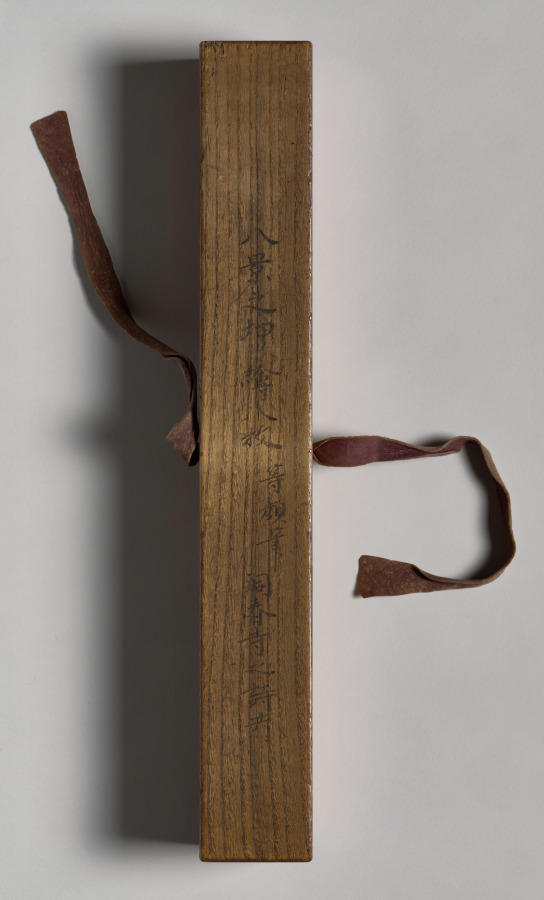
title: Poems and Pictures of the Eight Views of Xiao-Xiang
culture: Japan, Momoyama period (1573–1615)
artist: Unkoku Tōgan (Japanese, 1547–1618)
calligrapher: Inkei Gentetsu (Japanese, 1562–1612)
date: 1605–12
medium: Handscroll; ink on paper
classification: Painting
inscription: Each painting sealed with red gourd-shaped seal reading Unkoku (雲谷) and a square seal reading Tōgan (等顔).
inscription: Each painting prefaced with a titled poem on the Eight Views of Xiao-Xiang by Yujian Ruofen (active late 13th century) inscribed by Japanese Buddhist monk Inkei Gentetsu (1562–1612).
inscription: 右寫玉㵎之筆勢／雪舟末葉等顔筆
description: Unkoku Tōgan brushed these scenes using the splashed-ink technique associated in Japan with the Chinese monk Yujian Ruofen (active late 1200s). Xiao-Xiang refers to the region in present-day Hunan province, where the Xiang River and its tributaries converge. Each of the eight views evokes a time of day or season. The earliest surviving series of Xiao-Xiang paintings is by Wang Hong (active mid-1100s), but textual evidence tells us the theme appears earlier. It was later adopted in Japan and Korea, as seen here. The poems were inscribed by Inkei Gentetsu, the third abbot of the Rinzai Zen temple Tōshunji, Japan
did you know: The “Tō” of Tōgan comes from the name of painter Sesshū Tōyō (1420–1506).